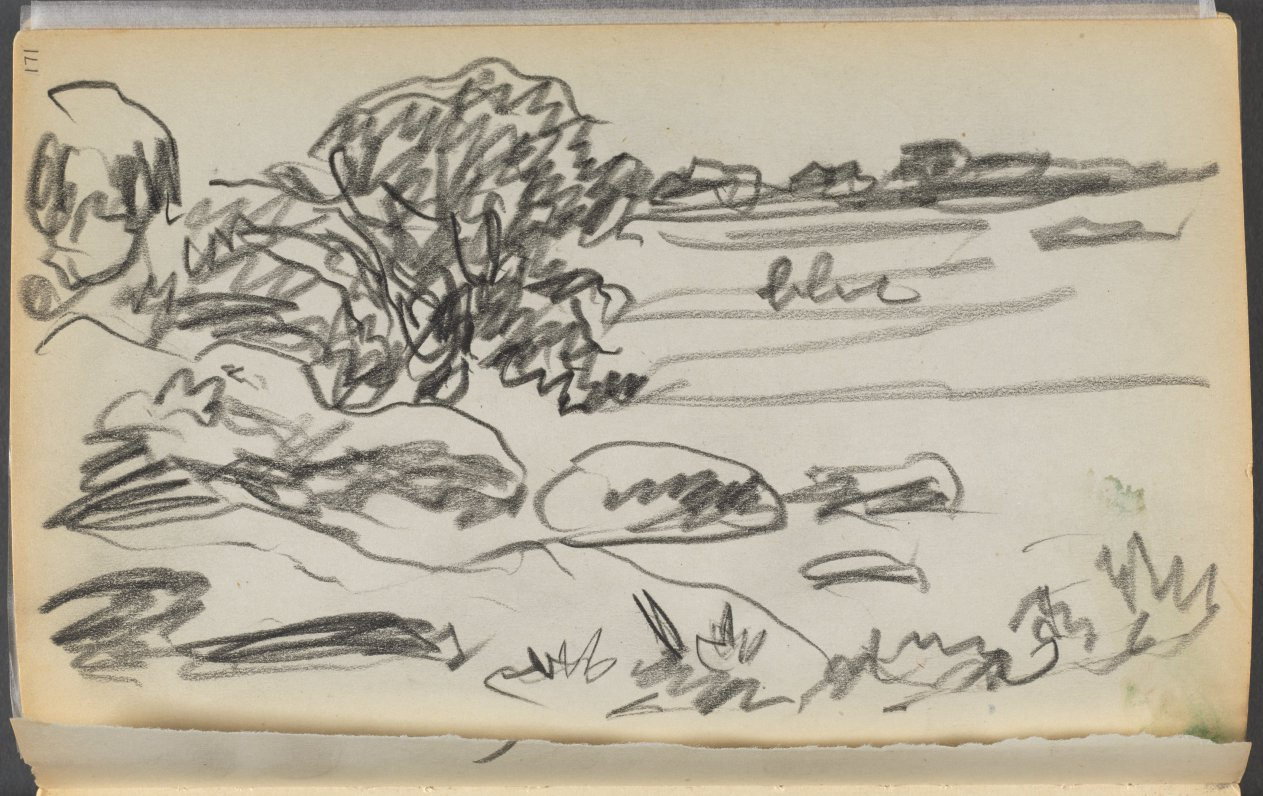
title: Sketchbook- The Granite Shore Hotel, Rockport, page 171: Landscape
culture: America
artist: Maurice Prendergast (American, born Newfoundland [now Canada], 1858–1924)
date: 1905–10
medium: graphite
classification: Bound Volume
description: This sketchbook contains 72 pages of pencil drawings and 9 watercolors of Cape Ann. On the inside of the cover Prendergast wrote the address of the Granite Shore Hotel in Rockport, Massachusetts.